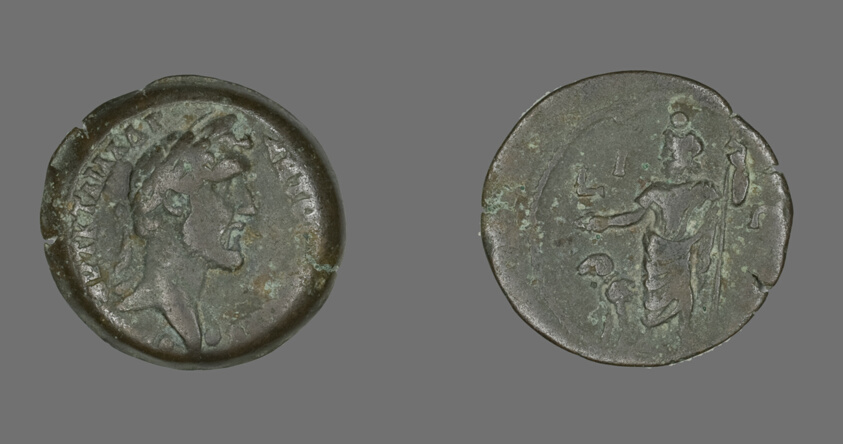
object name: Coin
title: Coin Portraying Emperor Antoninus Pius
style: roman period (egyptian), greco-roman (egyptian)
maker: Roman, minted in Alexandria, Egypt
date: 149-150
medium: Bronze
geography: Egypt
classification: coin; ancient art